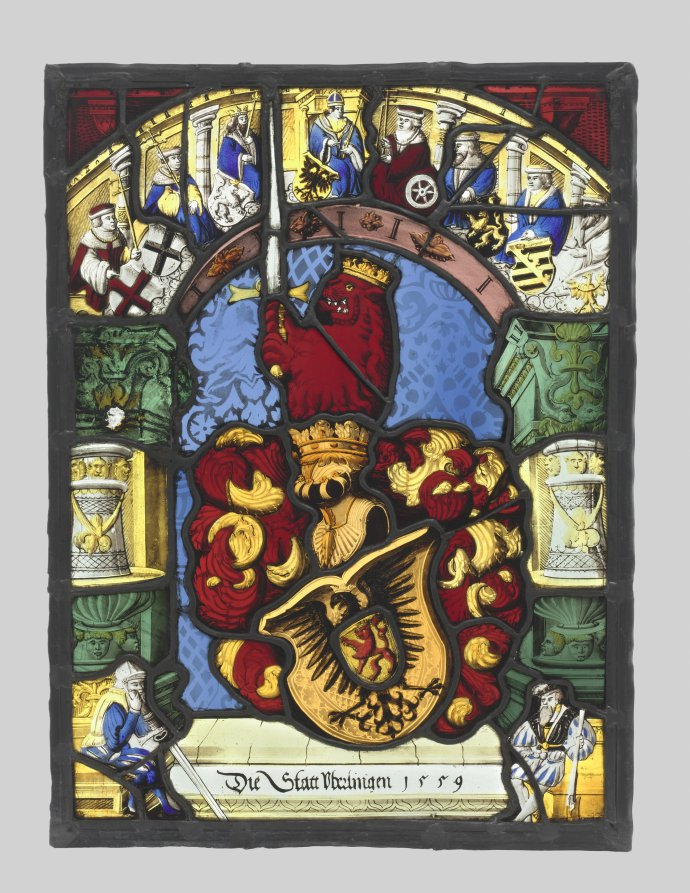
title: Arms of Ueberlingen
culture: Switzerland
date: 1559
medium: pot metal and white glass, silver stain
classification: Glass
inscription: below the coat of arms: "Die Statt Uberlingen 1559."